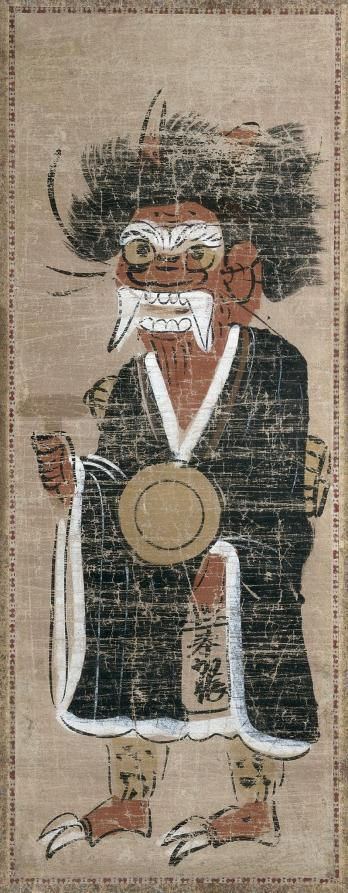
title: Demon Intoning the Name of the Buddha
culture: Japan, Edo period (1615–1868)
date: 1700s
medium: hanging scroll, ink and color on paper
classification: Painting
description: Images like this one that depicts a demon in the guise of an itinerant monk intoning the name of the Buddha are called Otsu-e, or "Otsu paintings." Otsu-e were made as souvenirs for travelers passing through the station of Otsu along the Tokaido, the route stretching from Edo (modern-day Tokyo) to Kyoto. Realized through a combination of woodblock printing, rapid brushstrokes, embellishment with color and gold pigments by stencil or by hand, the earliest Otsu-e, produced in the 17th century, were Buddhist and Shinto icons. Later images included figures popular from Kabuki plays, as well as scenes illustrating parables.